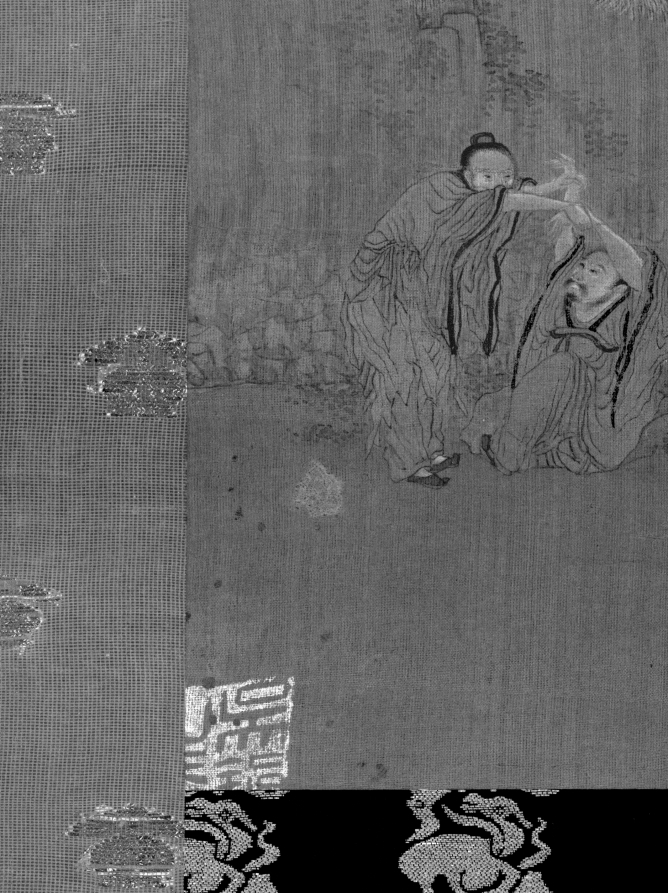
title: Listening to the Qin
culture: China, Ming dynasty (1368–1644)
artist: attributed to Tang Yin (Chinese, 1470–1523)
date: late 1400s–early 1500s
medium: hanging scroll; ink and light color on silk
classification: Painting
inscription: Artist's seal at lower left corner: Wu [remainder cut off].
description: The painting alludes to a legendary incident from the life of Ji Kang 嵇康 (AD 223–262), a guqin player who belonged to a group of 3rd-century eccentric intellectuals. Ji Kang is known as the author of a Guangling San (廣陵散; Melody from Guangling), a composition for the guqin so haunting that it aroused spirits to visit him. The painting depicts the moment when one of the spirits––disguised as a human––is helped by another to emerge from the ground, while others are drawn to the musician playing in his cottage under the full moon.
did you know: The painting is mounted in a Japanese-style three-tier format with futai.